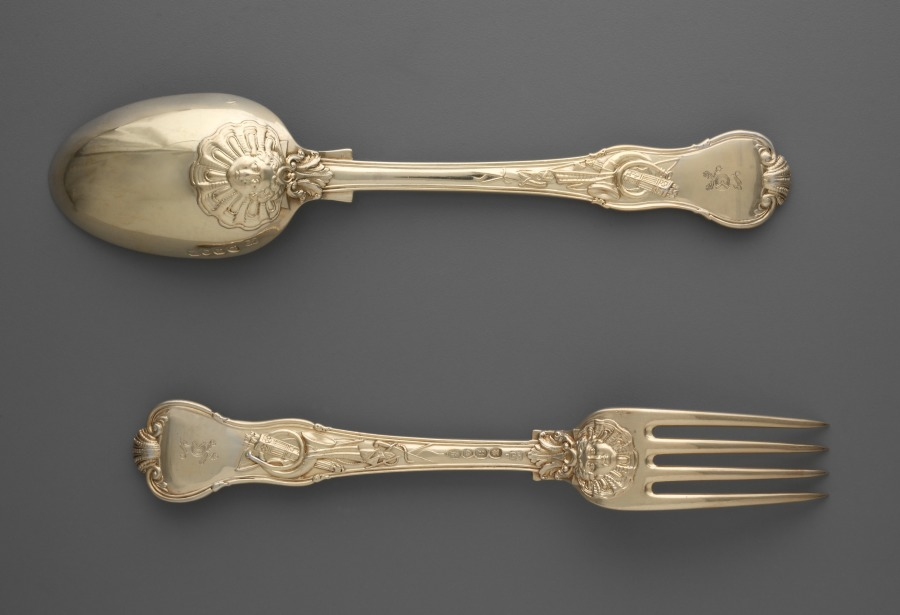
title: Dessert Fork and Spoon with Hunt Scenes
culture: England, London, 19th century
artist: Paul Storr (British, 1771–1844)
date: c. 1822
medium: gilt silver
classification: Silver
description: Paul Storr was perhaps the most famous and successful English silversmith working in the early 19th century. This fork and spoon were originally part of a larger set. The exceptionally high quality of the metalworking and gilding of these pieces is typical of Storr's work.